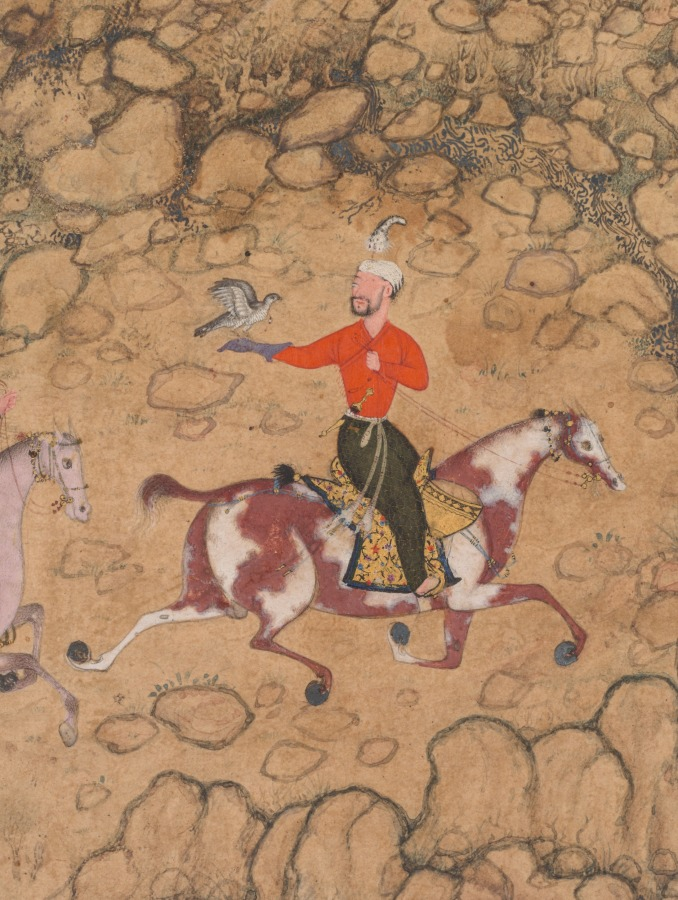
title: Hunting with falcons in a landscape (recto)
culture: Mughal India, court of Akbar (reigned 1556–1605)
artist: attributed to Abd al-Samad (Persian, c. 1510–1600)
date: c. 1558–60; borders added probably 1700s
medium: Gum tempera, ink, and gold on paper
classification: Painting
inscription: Inscription in upper right in nasta‘liq script, probably during the 1700s: the work of Mir Sayyid Ali, the illustrator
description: Mughal princes hunted on horseback with falcons. The hunting party would ride out into the wild and flush the prey from the brush. Then, its hood removed, the falcon would chase the prey and bring it down. This important work is thought to have been painted by one of the Persian artists Akbar’s father brought to India from Iran shortly after his arrival in India. The delicacy of the diminutive figures and the gently modeled rocks of the arid landscape contrast to the boldly dynamic paintings made by Indian artists.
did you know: The hunter’s glove is on the ground, as he pulls his falcon off the duck.